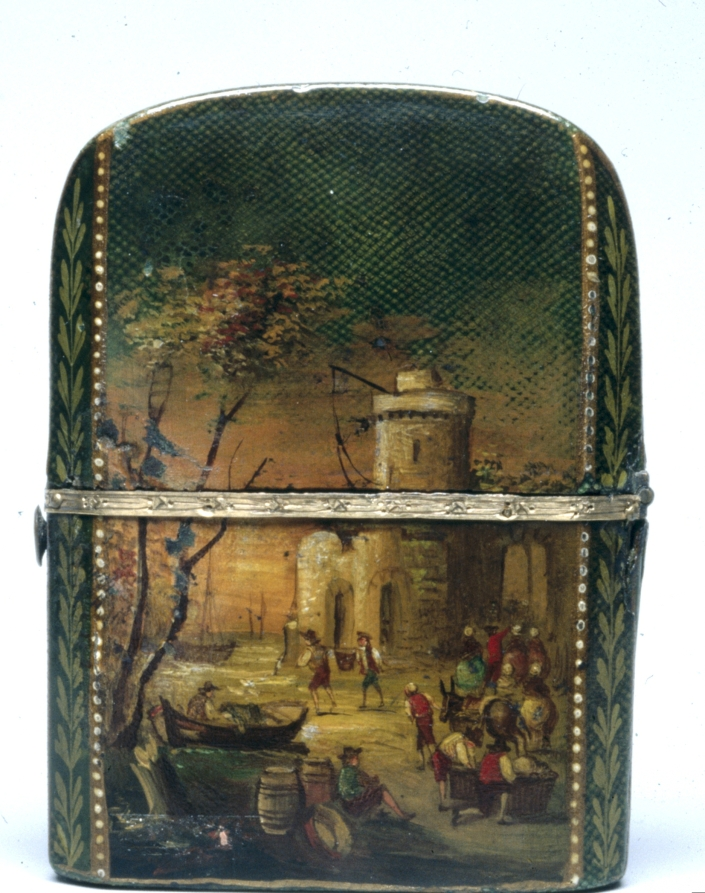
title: Necessaire with Scent Bottles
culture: France, early 19th century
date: early 1800s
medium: painted wood with gold mounts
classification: Miscellaneous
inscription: inscribed in ink inside cover: "Alex."